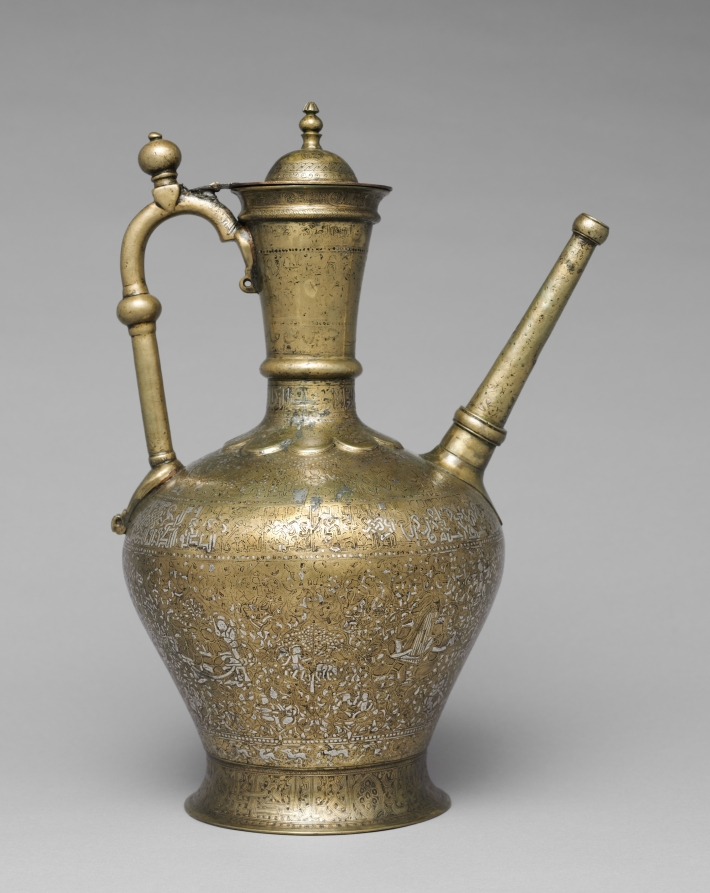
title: Luxury Ewer Extending Good Fortune to the Owner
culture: Iraq, possibly Mosul, Zangid or Artugid Period, 13th Century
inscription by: Ahmad al-Dhaki al-Mawsili (Iraqi, Mosul, active early 1200s?)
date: 1223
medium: brass inlaid with silver; lid and base added later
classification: Metalwork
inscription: Band on the neck (naskh): "Work of Ahmad al-Thaki, the engraver, al-Mawsili, in the year 620 and glory to my owner"; band at the base of the handle (naskh): "Work of Ahmad al-Thaki al-Mawsili"; graffiti of later owners, roughly scratched into the neck of the ewer: "Husayn ibn Qasim"; "Usta al-Muhtasib [?]"; band on the shoulder of the ewer (plaited, animated kufic): "Good luck, and learning, and commanding respect, and prosperity, and pride, and generosity, and faithfulness, and affection, and glory, and survival, and justice, and blessings, and exaltedness, and prosperity, and everlasting peace, and charitable giving."; band on the foot (naskh) [foot is a later addition]; this inscription has not yet been deciphered.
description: This silver inlaid ewer was produced for luxury clientele. The wide band around the body of the vessel displays vignettes of daily and courtly life contained within multilobed medallions. Some of the scenes feature falconry, hunting, dancing, and several groups of musicians. All these scenes are set off against a skillfully executed arabesque background—a pervasive motif in Islamic art characterized by interwoven vegetal and curvilinear elements. An inscription around the ewer’s shoulder extends good fortune, prosperity, and peace to the owner. The ewer is dated 1223 and signed by the master craftsman Ahmad al-Dhaki of Mosul.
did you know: Later owners roughly scratched their names into the neck of the ewer.